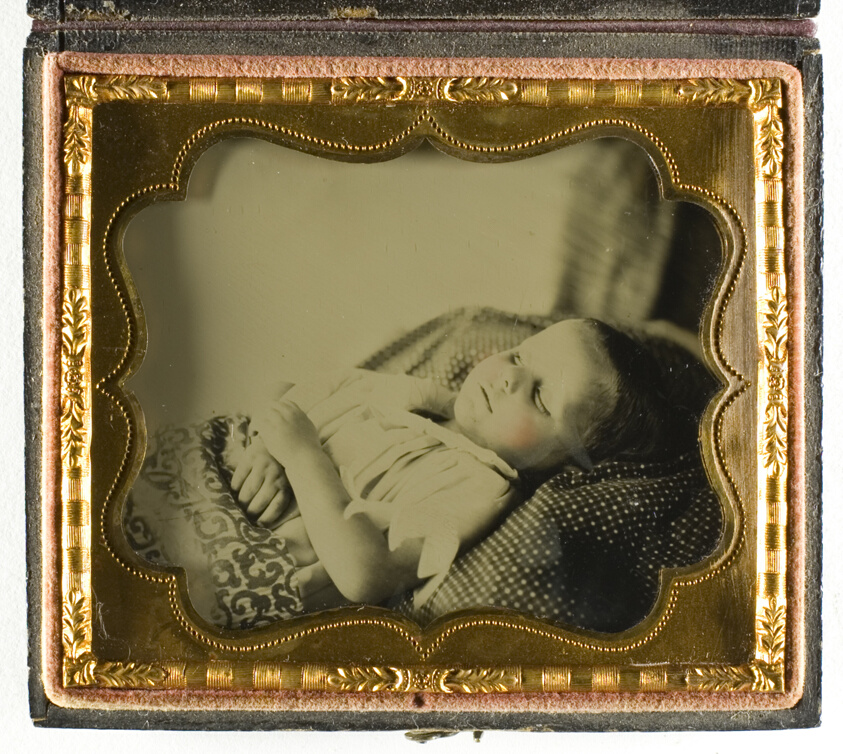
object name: Photograph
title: Untitled (Postmortem of Child)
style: 19th century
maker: Artist unknown; 19th century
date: 1850/74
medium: Ambrotype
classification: photograph; photography